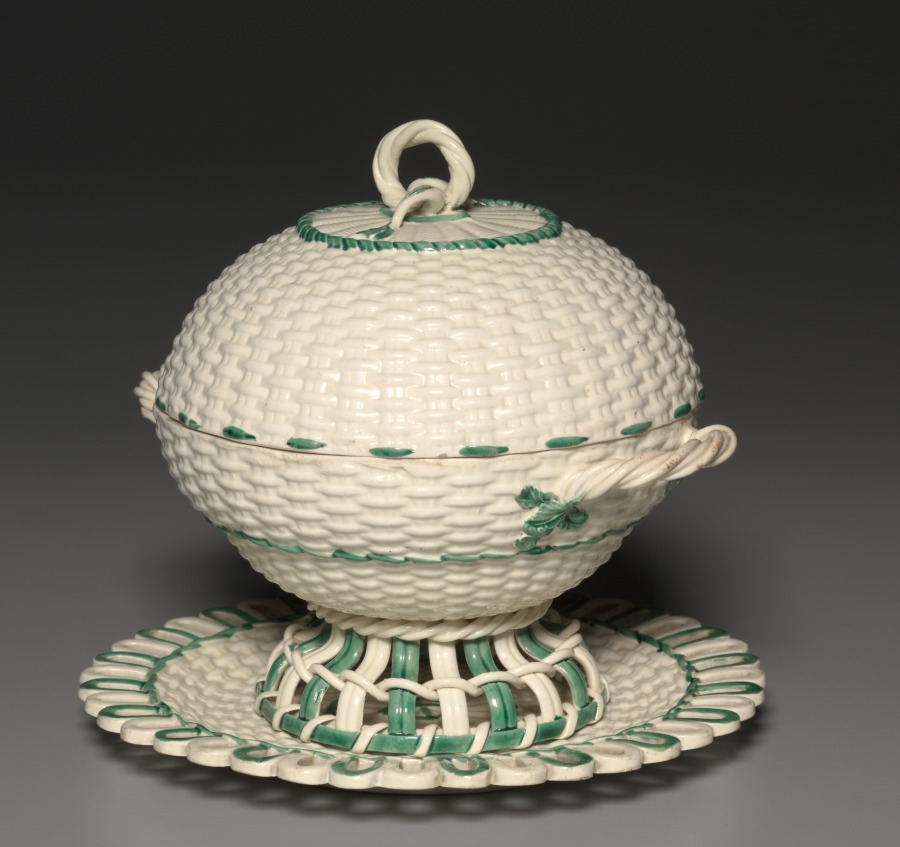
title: Wicker-Work Covered Sauce Tureen on Stand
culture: England, 18th-19th century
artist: Wedgwood Factory (British)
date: c. 1780–1840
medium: earthenware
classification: Ceramic